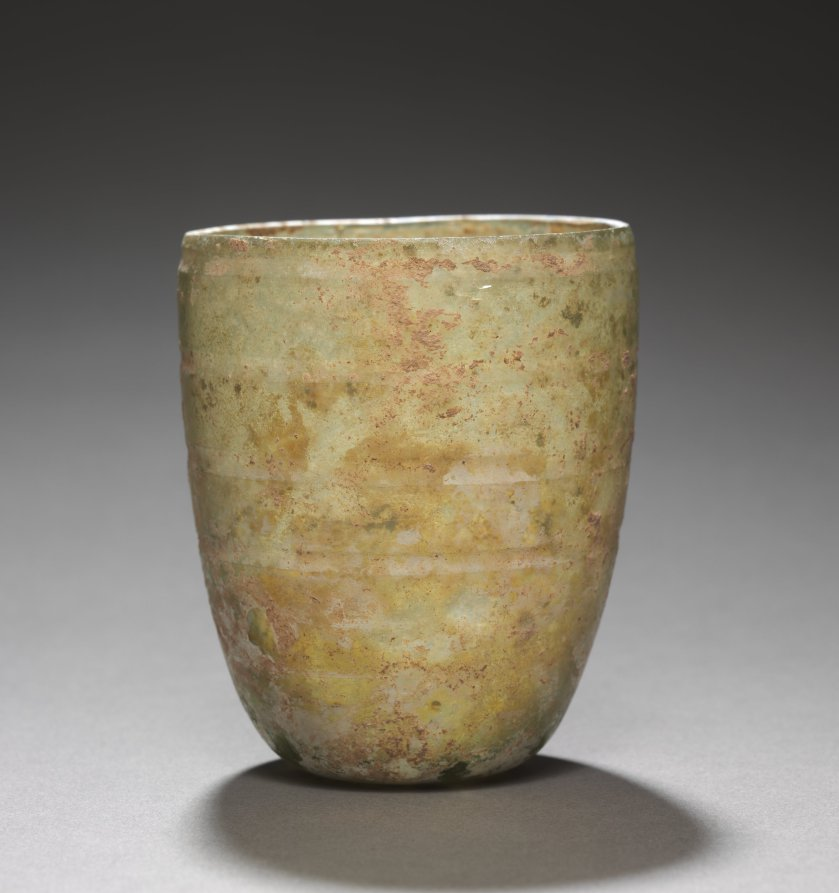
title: Cup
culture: Eastern Mediterranean, Roman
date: c. 300–400 CE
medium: glass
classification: Glass